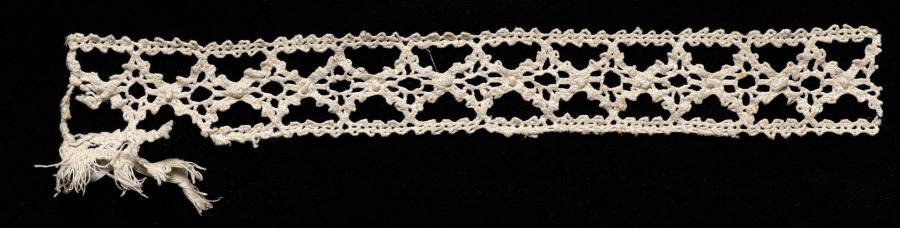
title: Lace Insertion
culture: Italy, Venice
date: 1540–60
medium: Bobbin lace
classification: Lace